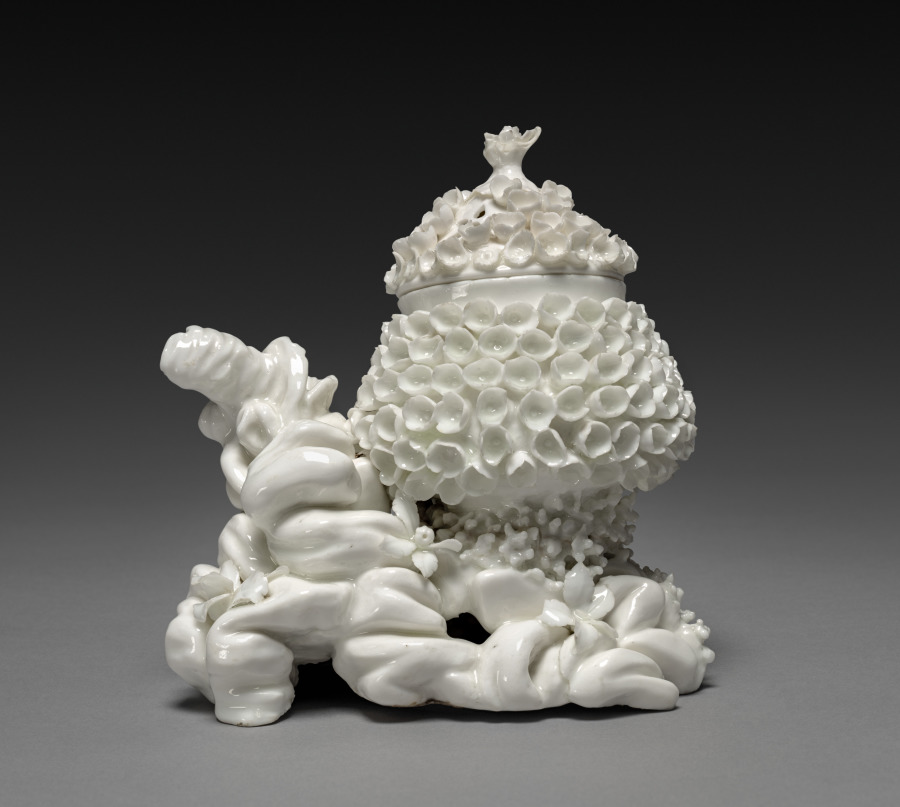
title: Potpourri Vase with Cover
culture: France, Vincennes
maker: Mennecy Factory (French)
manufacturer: Vincennes Porcelain Factory (France, 1740–56)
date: c. 1750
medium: soft-paste porcelain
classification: Ceramic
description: The delicate flowers that cover the lid and base of this vase draw inspiration from the schneeballblüten, or guelder rose, pattern produced at the German Meissen porcelain factory. The flowers on the lid are spaced by small, unobtrusive perforations that allow the scent of the potpourri, a mixture of flowers, herbs, and spices placed inside this vase, to disperse.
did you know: This style of potpourri vase, a pot atop a rockwork base, was popularly produced by major 18th-century porcelain factories including those at Vincennes, Chantilly, and Saint-Cloud.